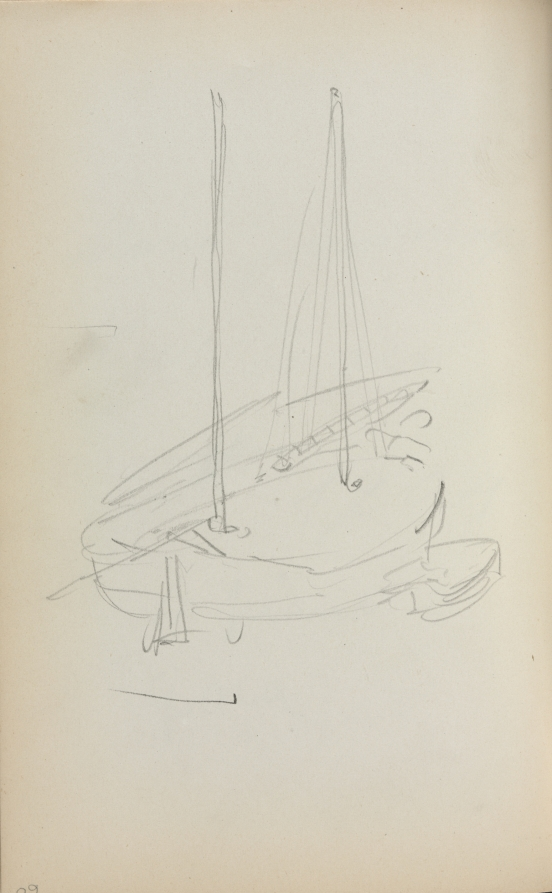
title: Italian Sketchbook: Sailboat (page 60)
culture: America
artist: Maurice Prendergast (American, born Newfoundland [now Canada], 1858–1924)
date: 1898–1899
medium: pencil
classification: Bound Volume